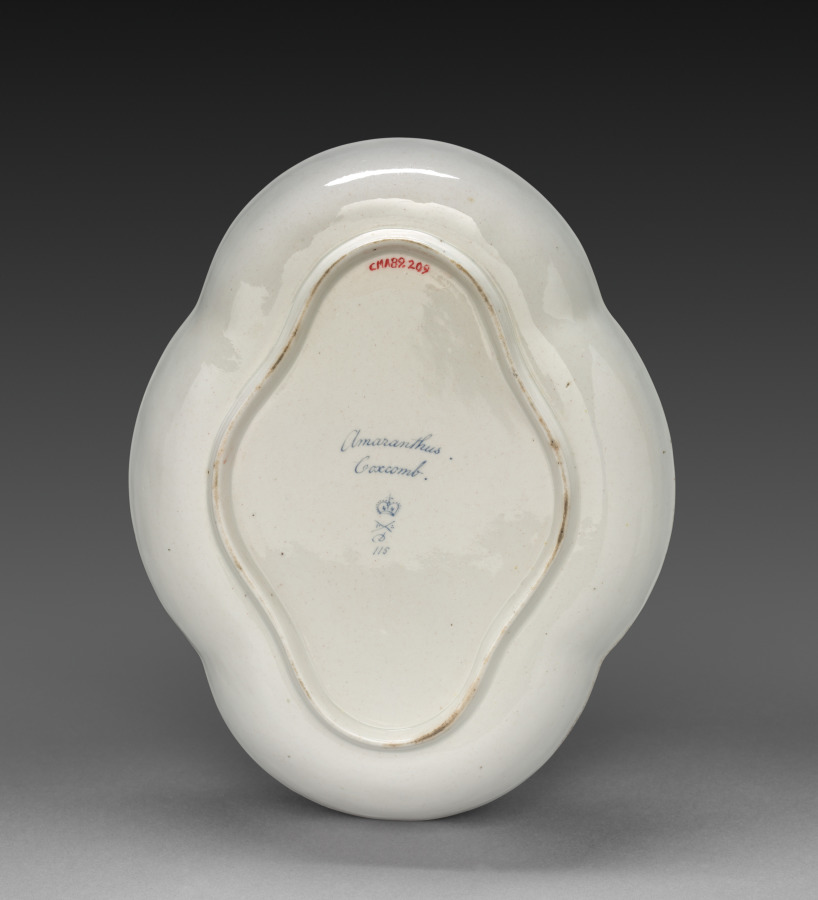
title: Quatrelobed Dish from Dessert Service: Coxcomb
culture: England, Derby, 18th century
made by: Derby (Crown Derby Period) (British)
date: c. 1800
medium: porcelain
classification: Ceramic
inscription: inscribed in blue on back: Amaranthus./Coxcomb./crown/crossed batons and dots/D/115.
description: Each dish is decorated with recognizable plants, the names of which are inscribed on the base in both Latin and English. Identifying the blossoms only became customary in the late 18th century when a single piece of porcelain was decorated with one species, and flowers were represented along with leaves, stems, seed pods, and roots. All of this reflects Carolus Linnaeus’s recent invention of a scientific method to categorize all known flora. The decorations on the Derby factory’s products derive from contemporary English botanical publications. For instance, illustrations in William Curtis’s The Botanical Magazine served as models for the French marigold and nettle-leaved bell flower on the dessert service.